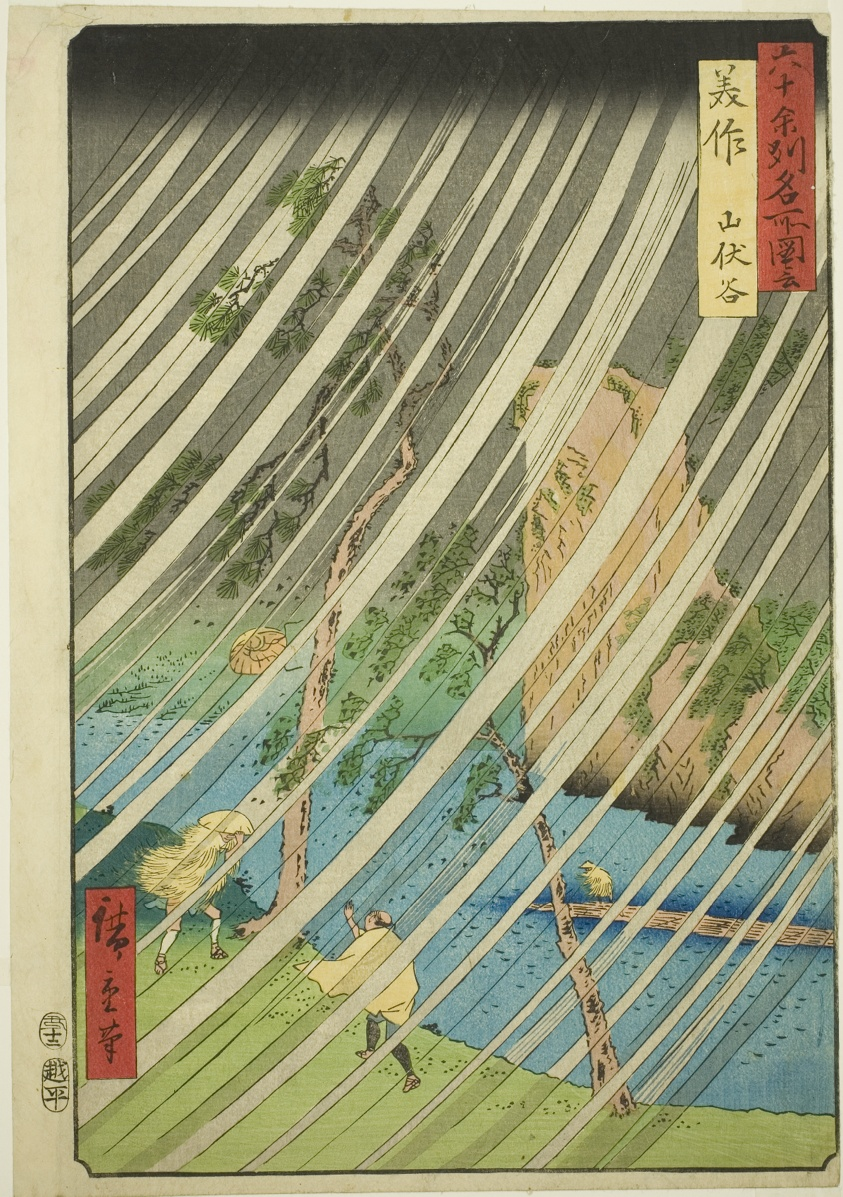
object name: Print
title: Mimasaka Province: Yamabushi Valley (Mimasaka, Yamabushidani), from the series "Famous Places in the Sixty-odd Provinces (Rokujuyoshu meisho zue)"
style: Japanese (culture or style)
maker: Utagawa Hiroshige 歌川 広重; Japanese, 1797-1858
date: 1853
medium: Color woodblock print; oban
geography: Japan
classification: woodblock print; print; asian art